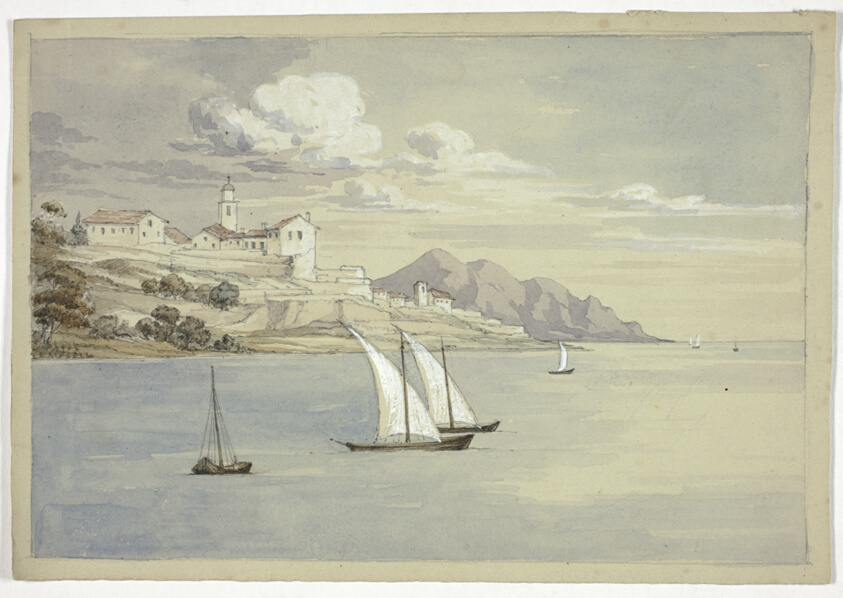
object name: Drawing and Watercolor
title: Portofino from the Sea, Genoa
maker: Elizabeth Murray (English, c. 1815-1882)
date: October 1841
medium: Watercolor and white gouache over graphite on gray wove paper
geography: England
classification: watercolor; drawings (visual works); prints and drawing